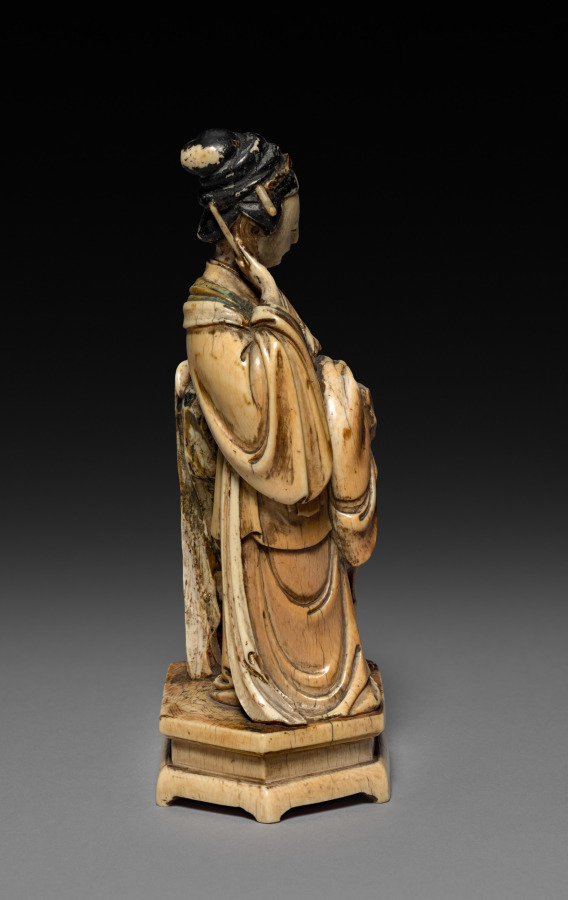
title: Female Figure with Crane and Squirrel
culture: China, Qing dynasty (1644-1911), Kangxi reign (1662-1722)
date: 1662–1722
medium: ivory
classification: Ivory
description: In the Qing dynasty (1644–1911), luxury items became more affordable to larger parts of the society, including women, merchants, and literati in non-official positions. Imperial patronage and a growing urban population encouraged consumption of luxury goods and local craftmanship. This ivory form of a woman with a crane illustrates the superb skills and the creative mind of the talented artisan who sought clients on a competitive market.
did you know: The ivory has aged to a rich amber, while traces of its original red and green paint remain on the woman’s cuffs and collar.